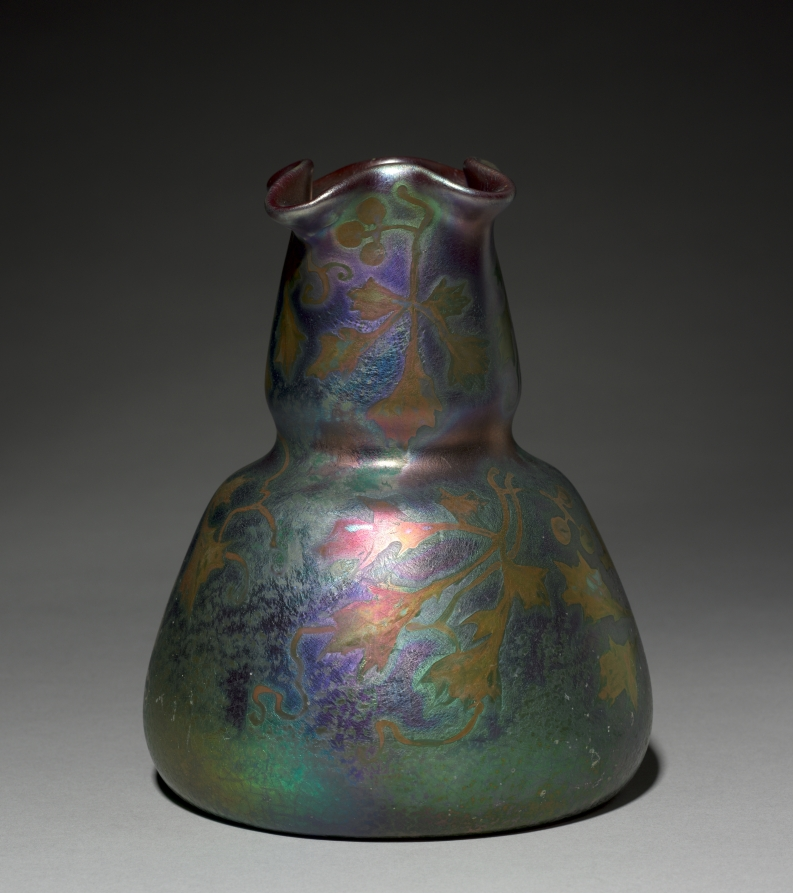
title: Vase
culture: America, Ohio, Zanesville, 20th century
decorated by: Jacques Sicard (French, 1865–1923)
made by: and Weller Pottery (American)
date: 1901–1907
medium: earthenware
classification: Ceramic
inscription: inscribed on body near base in purple lustre glaze (in ligature): Weller Sicard.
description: This vase's distinctive metallic sheen is achieved through a technique known as luster glazing, in which ground metals, typically silver, gold, or platinum, are incorporated into the glazing process. A green-gold luster glaze forms the vase's decoration of vines and leaves.